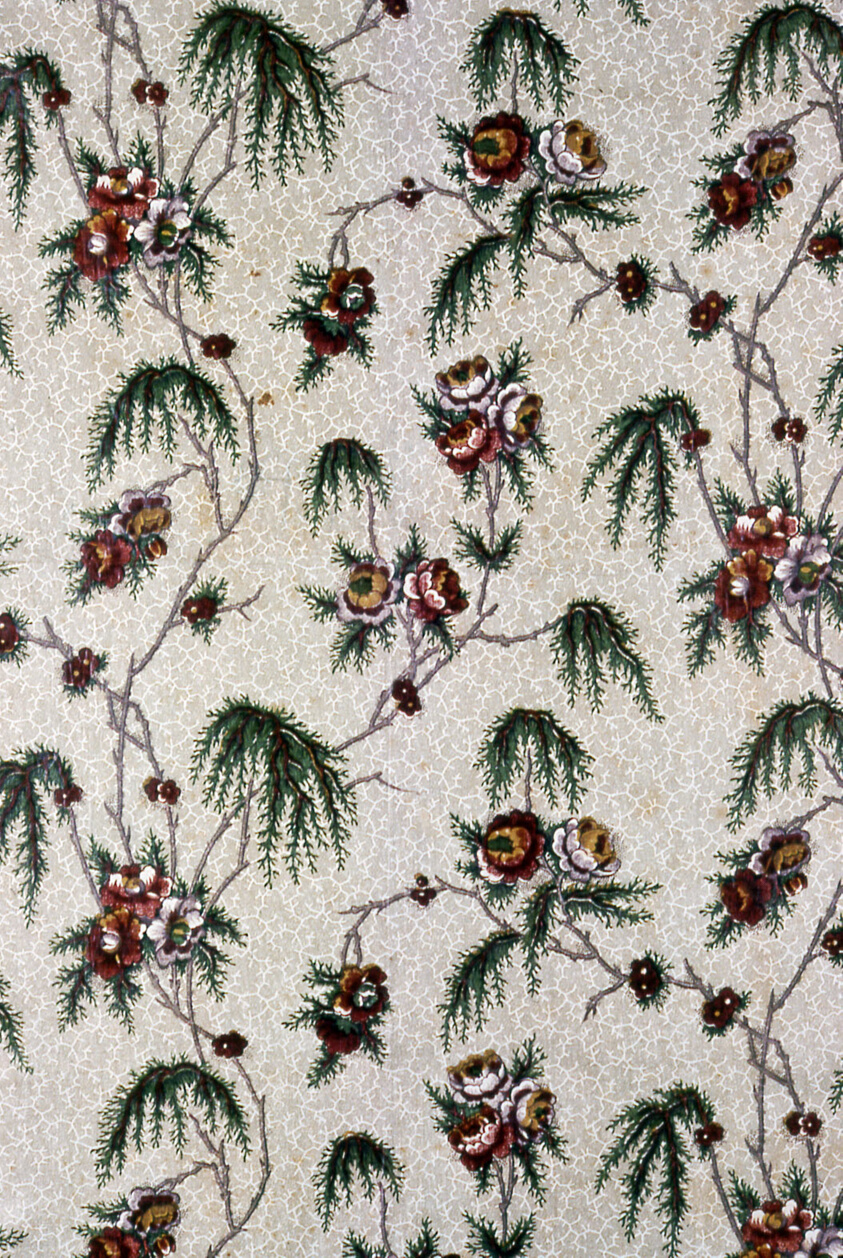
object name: Textile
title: Panel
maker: England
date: 1750/1800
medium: Cotton, plain weave; roller printed; glazed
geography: England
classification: textile; weaving; weaving - printed; printed textile